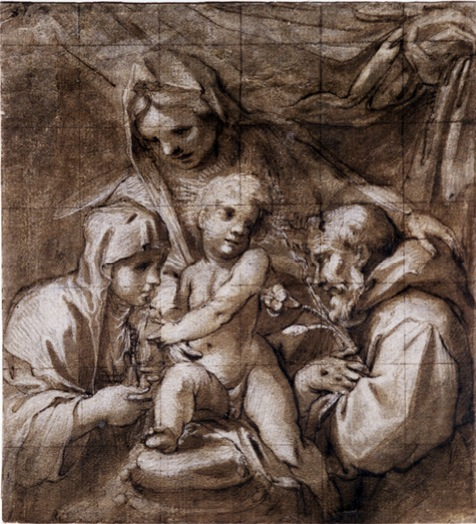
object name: Drawing and Watercolor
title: The Virgin and Child with Saint Clare and Saint Francis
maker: Circle of the Carracci; Italian, late 16th century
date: 1580/90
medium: Pen and brown and black ink, with brush and brown wash and touches of black chalk, heightened with lead white gouache, on cream laid paper, squared for transfer in black chalk, laid down on white Japanese paper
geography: Italy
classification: drawings (visual works); paper; prints and drawing